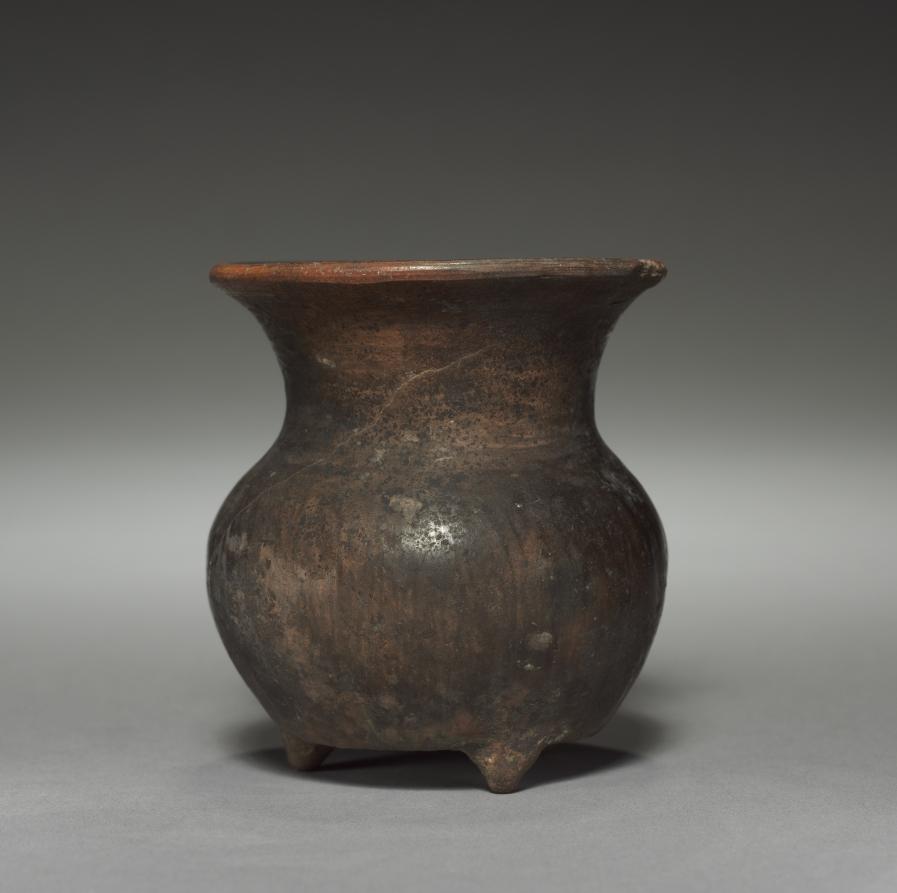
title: Vase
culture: Mexico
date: before 1521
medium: pottery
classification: Ceramic